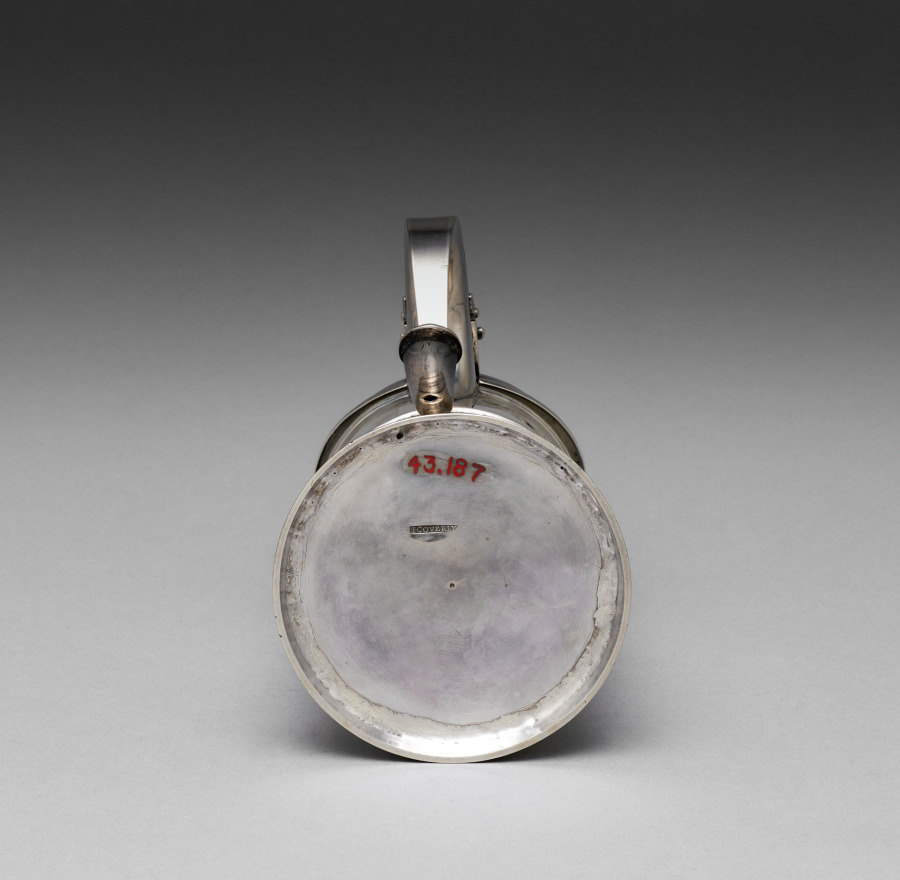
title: Tankard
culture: America, Massachusetts, Boston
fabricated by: John Coverly (American, 1800)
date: c. 1760–80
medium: silver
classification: Silver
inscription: Engraved on handle: "P" over "I * H".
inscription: Stamped on lid: "Coverly"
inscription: Stamped underside: "I.COVERLY".